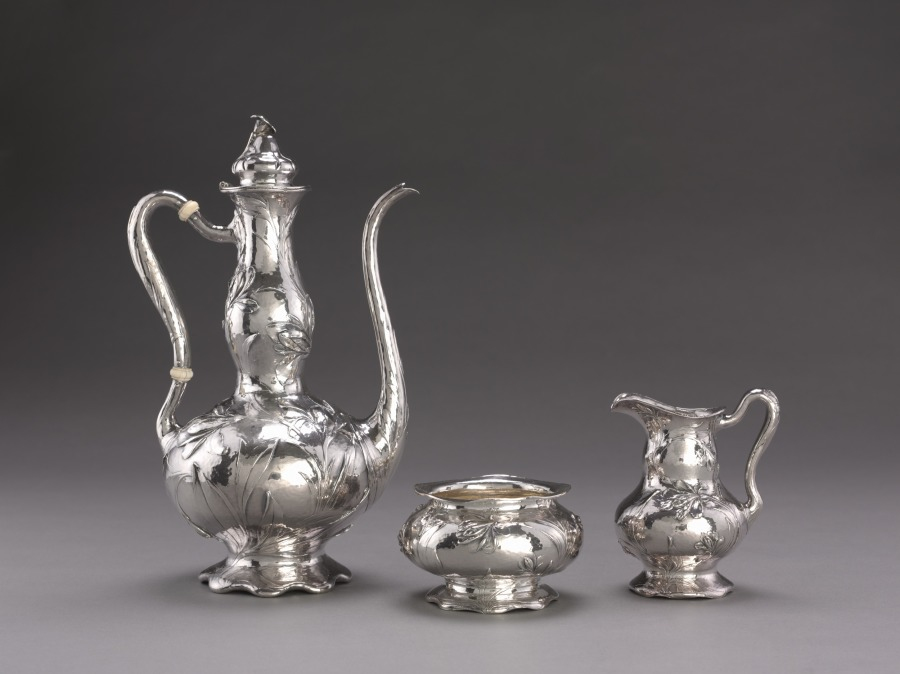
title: Martelé Coffee Service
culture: America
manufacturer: Gorham Manufacturing Company (America, est. 1831)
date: c.1900–1910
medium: silver, ivory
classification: Silver